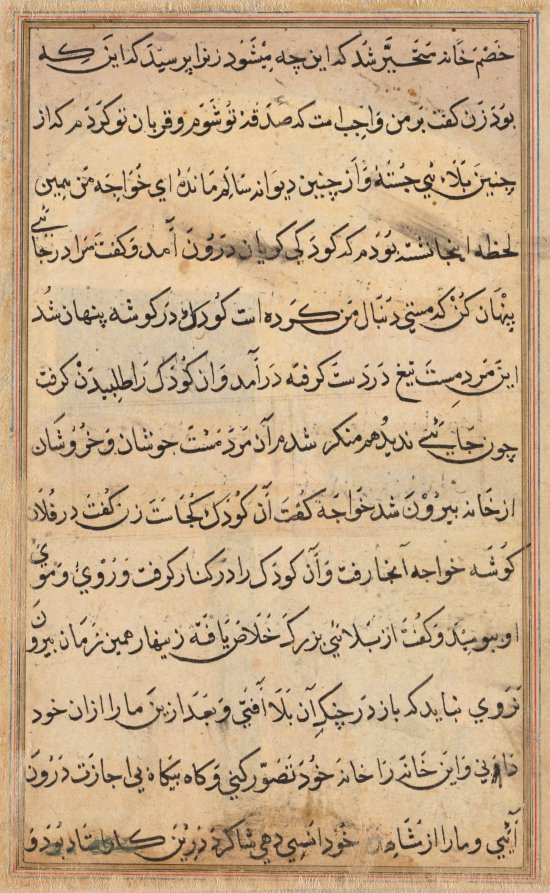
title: Page from Tales of a Parrot (Tuti-nama): text page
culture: Mughal India, court of Akbar (reigned 1556–1605)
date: c. 1560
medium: gum tempera, ink, and gold on paper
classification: Painting